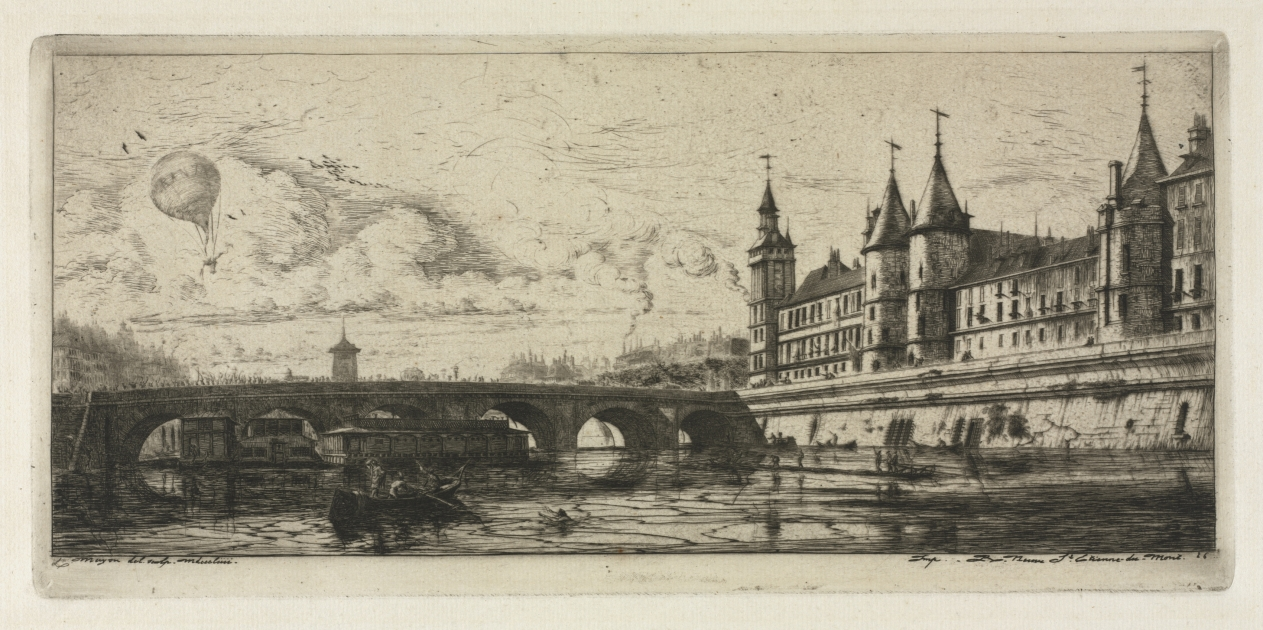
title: Etchings of Paris: The Exchange Bridge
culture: France, 19th century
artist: Charles Meryon (French, 1821–1868)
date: 1854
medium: etching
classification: Print